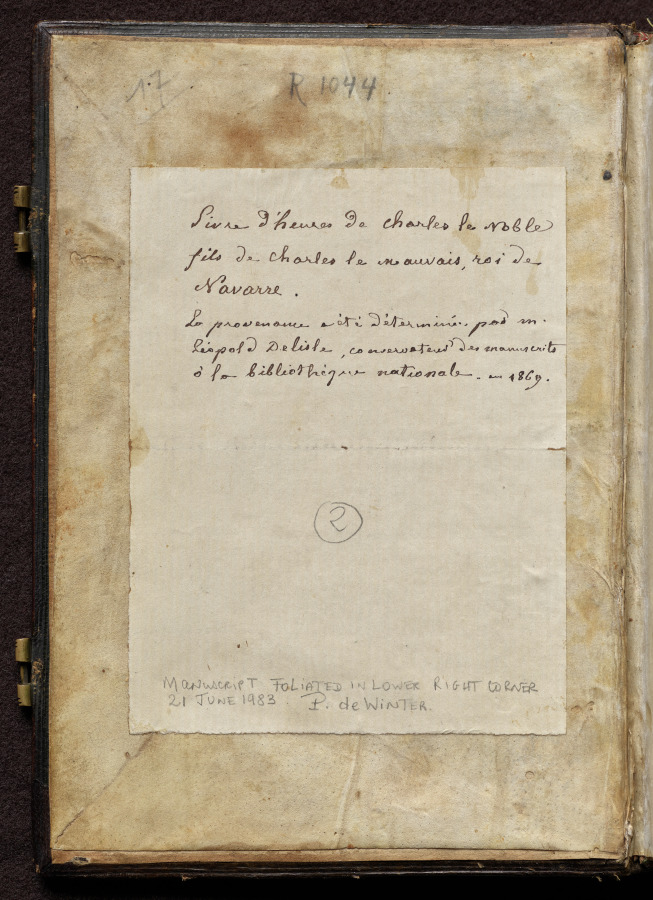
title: Hours of Charles the Noble, King of Navarre (1361-1425)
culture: France, Paris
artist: Master of the Brussels Initials and Associates (French)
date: c. 1404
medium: ink, tempera, and gold on vellum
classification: Bound Volume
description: Creating a book of hours was an arduous and costly process. These books were made from vellum, animal skins that were laboriously prepared in a multistep process. The texts were written with a quill pen and the illustrations were hand painted using water-based pigments. Gold was added for a look of great luxury. Such a book would take years to create, making these valuable objects unique.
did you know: King Charles the Noble likely used this book of hours at his royal castle of Olite in Navarra in northern Spain.